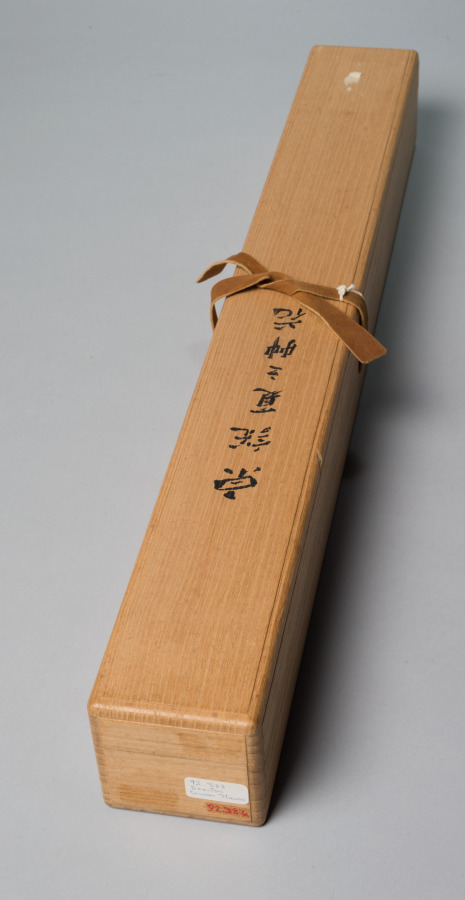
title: Summer Flowers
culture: Japan, Edo period (1615–1868)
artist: Kitagawa Sōsetsu (Japanese, active 1639–50)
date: mid-1600s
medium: hanging scroll; ink, color, and gold on paper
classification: Painting